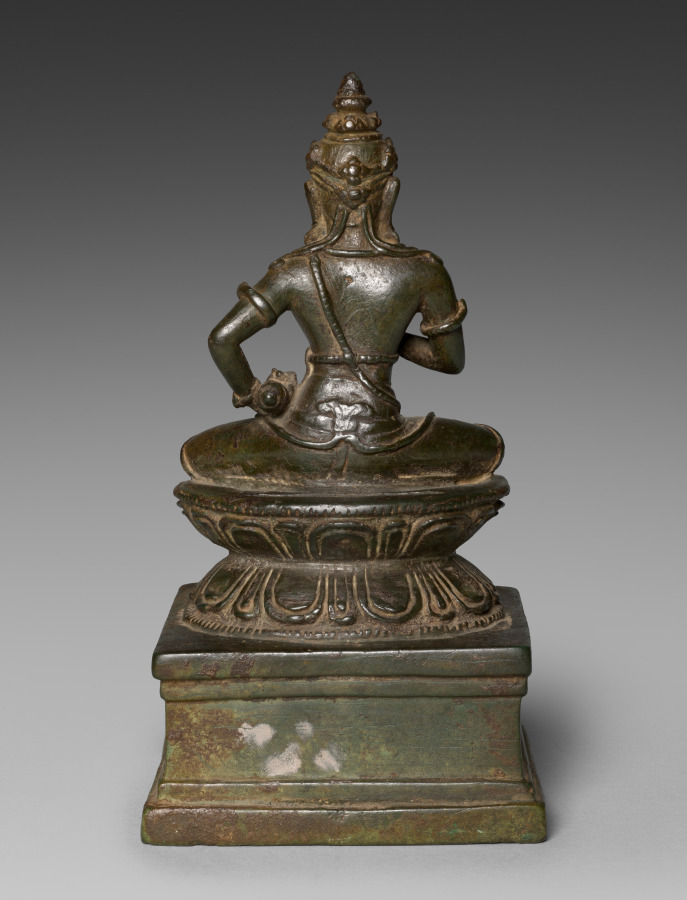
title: Vajrasattva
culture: Cambodia, style of Angkor Thom, 12th-13th century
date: 1100s–1200s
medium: bronze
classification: Sculpture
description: Vajrasattva is a Buddhist being of enlightenment who holds the vajra, or thunderbolt, in his right hand and a bell in his left. The vajra and bell are the basic implements used in tantric rituals that were popular under Jayavarman VII and practiced at Banteay Chhmar. Tantra is a form of Buddhism that makes use of rituals and mantras to aid practitioners in reaching their goals quickly, as though with the speed of lightning. Tantric texts and rituals were used frequently in Cambodia, from the 900s onward, but they were especially prominent under Jayavarman VII. This form of Buddhism appears to have been supplanted by other forms after the 1400s. Small bronze images of Vajrasattva may have been brought out from a temple treasury during the performance of Buddhist rituals that followed the instructions in a Sanskrit text, brought to Cambodia from India, called the Hevajra-tantra. In that text Vajrasattva manifests at key moments in the rituals.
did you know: From the back of the crown hang cords, which drape over the shoulders. The same type of cords hang from the back of the belt, coiling over the legs symmetrically on either side.